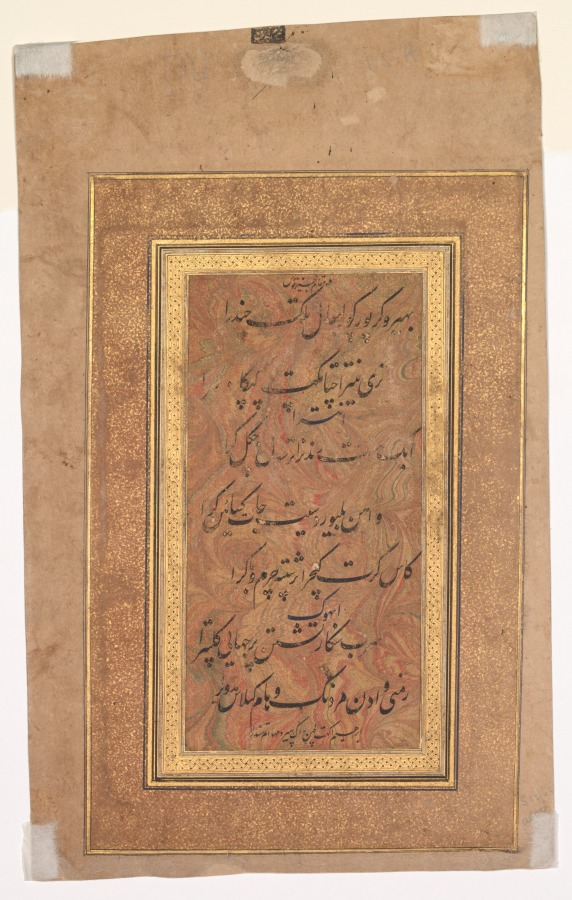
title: Eight Lines of Musical Poetry of the Jajner Nauras (Rag Bhairav) of Ibrahim Adil Shah of Bijapur (verso)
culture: Southwestern India, Karnataka, Bijapur, 17th century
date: late 1600s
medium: Gum tempera, ink, and gold on paper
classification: Calligraphy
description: Ibrahim Adil Shah II was a visionary ruler in the southern territories of the Deccan between 1580 and 1627 with his court based in the city of Bijapur. He maintained independence from Mughal encroachments from the north and fostered a distinctive culture infused with mystical Sufi ideals and a distinctive blending of Hindu and Islamic elements. This work of calligraphy is a verse composed by Ibrahim Adil Shah II that exemplifies his love of music and poetry. Normally a Hindu court tradition, ragamalas, or musical modes, were recast by Ibrahim Adil Shah in the local Dakhini language and incorporated into his Islamic milieu. The spectacular marbling on which the verse is written in Arabic script is a characteristic of the Deccan, where marbling was prized for its mysterious and random beauty. Mounted on an imperial Mughal album page with an image of the Hindu ruler Ram Singh on the verso, the placement of this Deccani calligraphy may have functioned as a tribute to Ram Singh’s father, who served the Mughal emperor in the Deccan from 1659 until 1666.